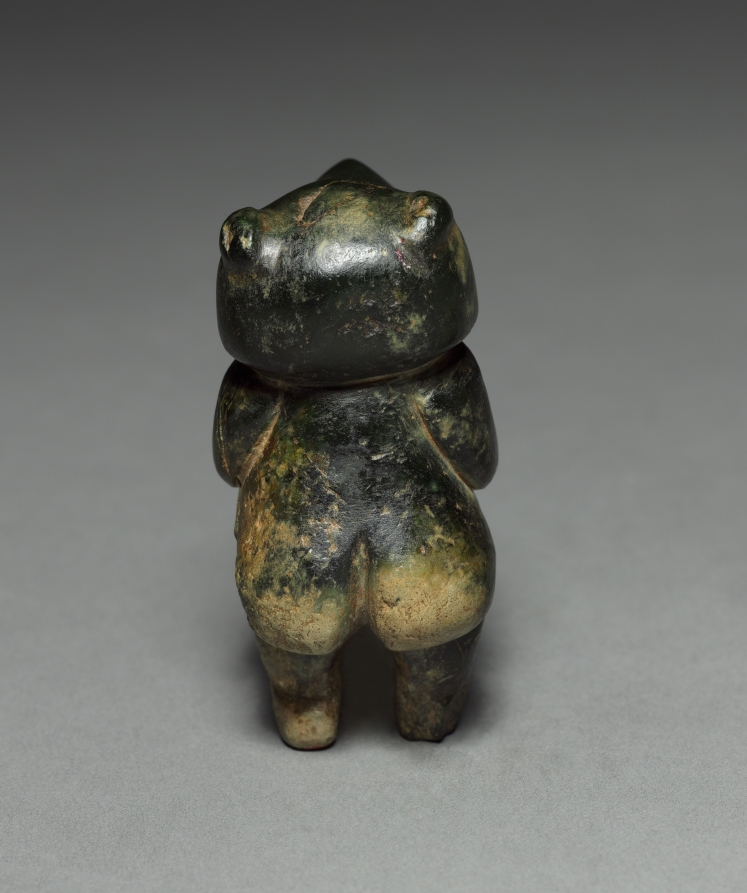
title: Figurine with Animal Headdress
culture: Pre-Columbian style(?), 20th century (?)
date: 20th Century(?)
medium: serpentine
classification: Sculpture